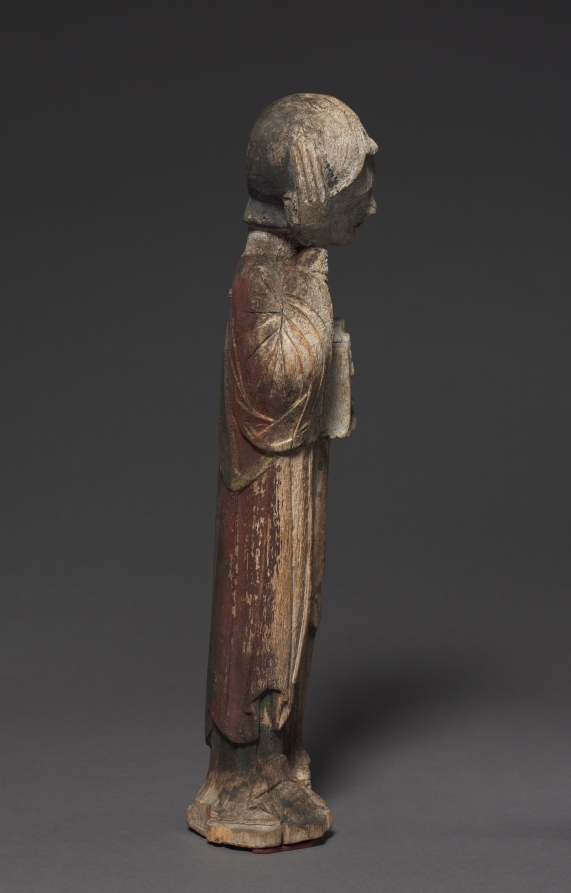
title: Mourning Saint John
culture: Austria, Region of Salzburg, Lungau?, 13th century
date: c. 1240–1260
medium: painted wood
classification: Sculpture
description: These traditional devotional figures at one time formed a Crucifixion group with a Crucified Christ (now lost). The ensemble may have been mounted high above the entrance to the sanctuary of a church on a barrier called a rood beam, beyond which lay people were not allowed. Crucifixion groups were common in medieval churches where they symbolized the sacrifice and real presence of Christ in the Mass.